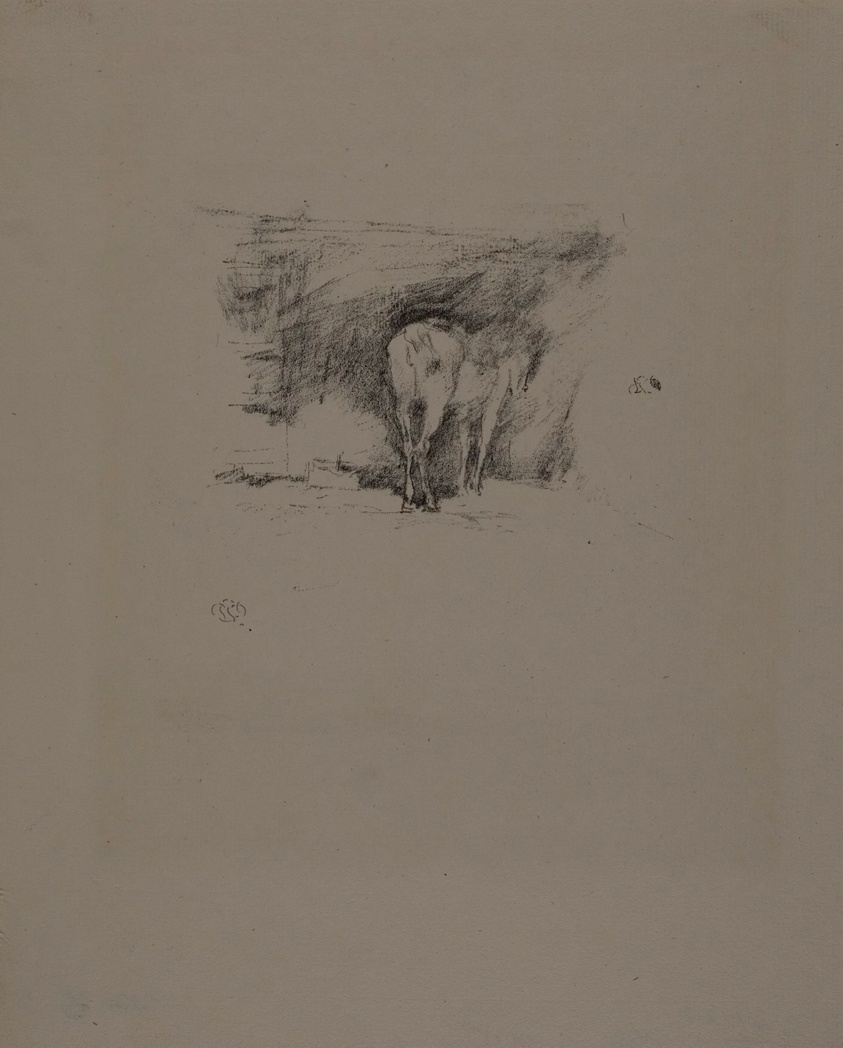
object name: Print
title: Study of a Horse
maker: James McNeill Whistler (American, 1834-1903)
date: 1895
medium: Transfer lithograph in black on cream laid paper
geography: United States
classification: transfer lithograph; lithograph; print; prints and drawing; paper